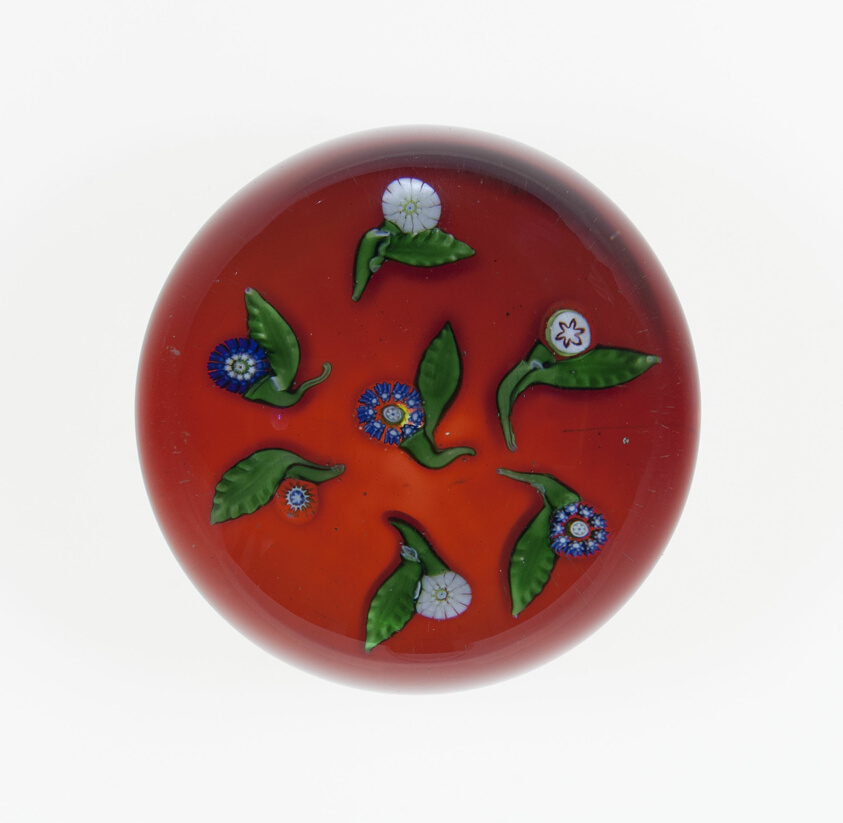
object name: Glass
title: Paperweight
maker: Saint-Louis Glassworks (Cristalleries de Saint-Louis); Lorraine, France, founded 1586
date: c. 1845–1860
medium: Glass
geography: Saint-Louis-lès-Bitche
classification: paperweight; glass